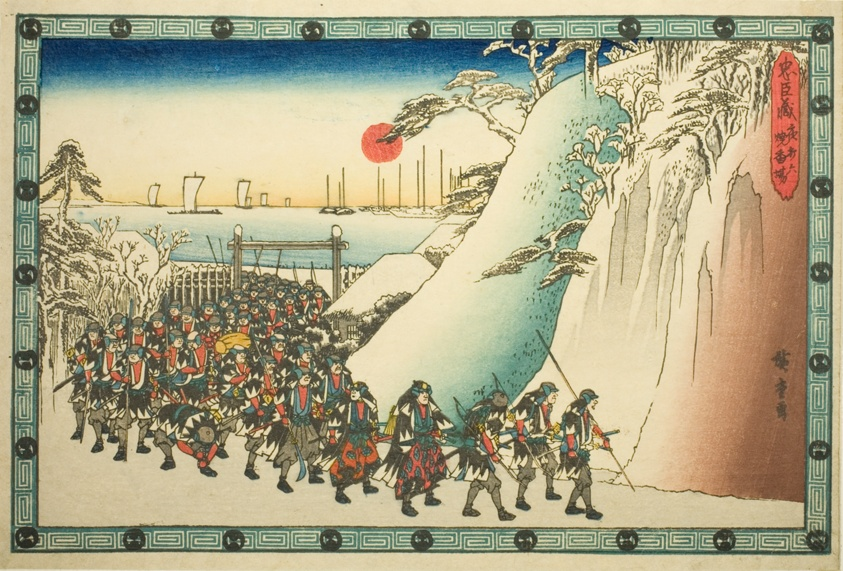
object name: Print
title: The Night Attack, Part 6: Offering Incense (Youchi roku, shoko ba), from the series "The Revenge of the Loyal Retainers (Chushingura)"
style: Japanese (culture or style)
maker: Utagawa Hiroshige 歌川 広重; Japanese, 1797-1858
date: c. 1834/39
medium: Color woodblock print; oban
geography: Japan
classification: woodblock print; print; asian art